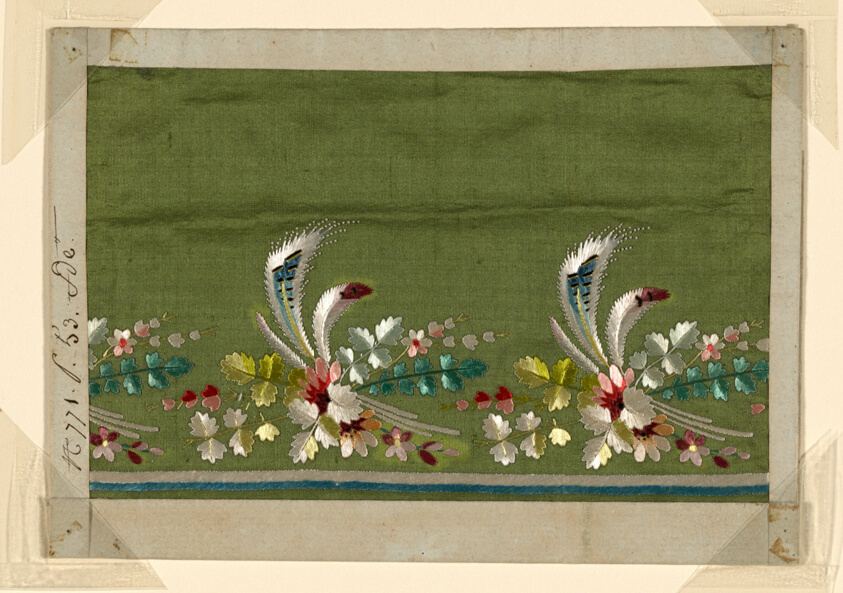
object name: Textile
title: Salesman's Sample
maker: Probably France, Lyon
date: 1780-1810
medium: Silk, warp-faced plain weave; embroidered with silk floss in outline and satin stitches; French knots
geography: France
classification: textile; needlework (visual works); costume; costume - embroidery; embroidery; needlework - costume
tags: flowers, foliage, flora